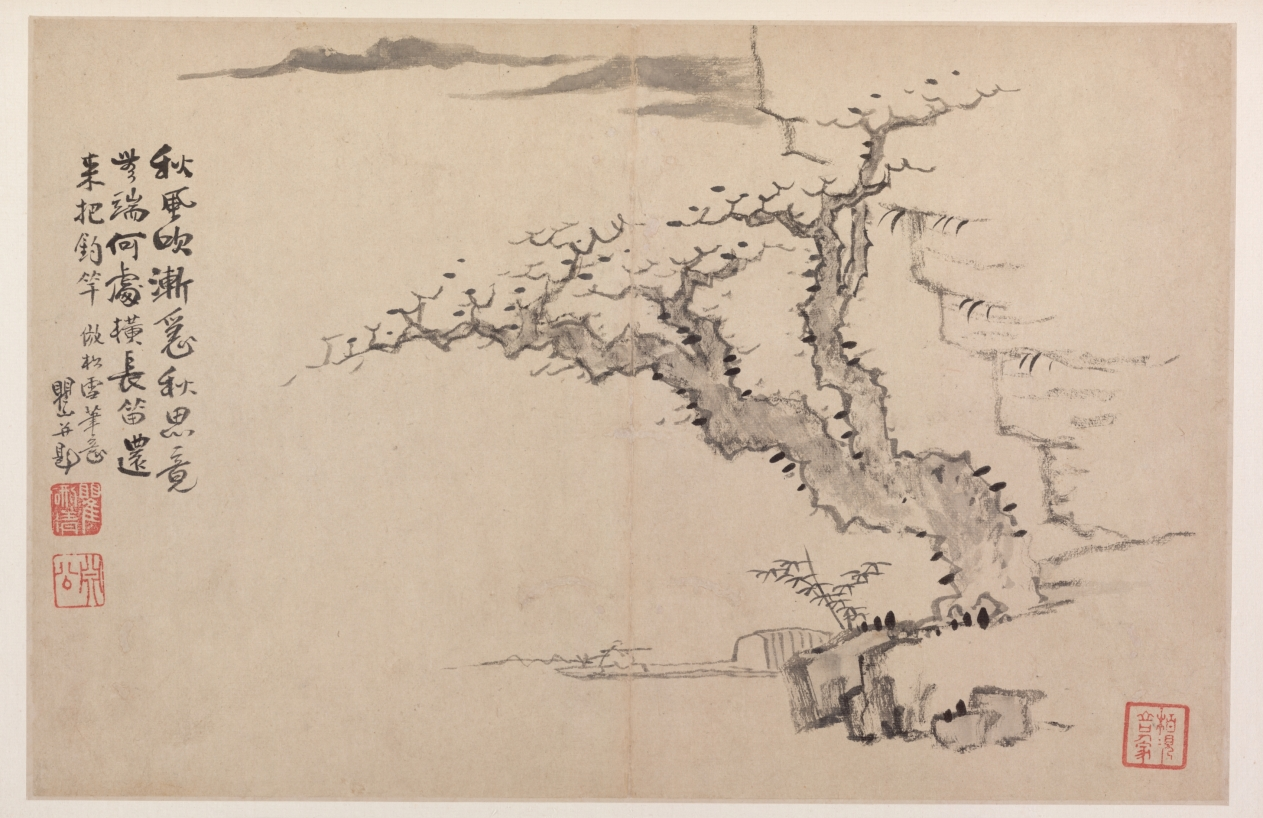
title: Landscapes in Various Styles after Old Masters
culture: China, Qing dynasty (1644-1911)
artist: Mei Qing (Chinese, 1623–1697)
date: 1690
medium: album leaf: ink and color on paper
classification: Painting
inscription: Artist's inscriptions, signatures, and 35 seals: F. The blowing of the fall wind decreases gradually, Melancholy thoughts of autumn are, in the end, inexplicable. Where do I play my long flute [and] at the same time hold a fishing pole? Imitating Sung-hsüeh's [Chao Meng-fu] brush idea. Ch'ü-shan [painted] and inscribed [2 seals] Ch'ü-hsing, Ch'ing; Yüan-kung. [seal, lower right corner] Po-chien shan-k'ou jen-chia.